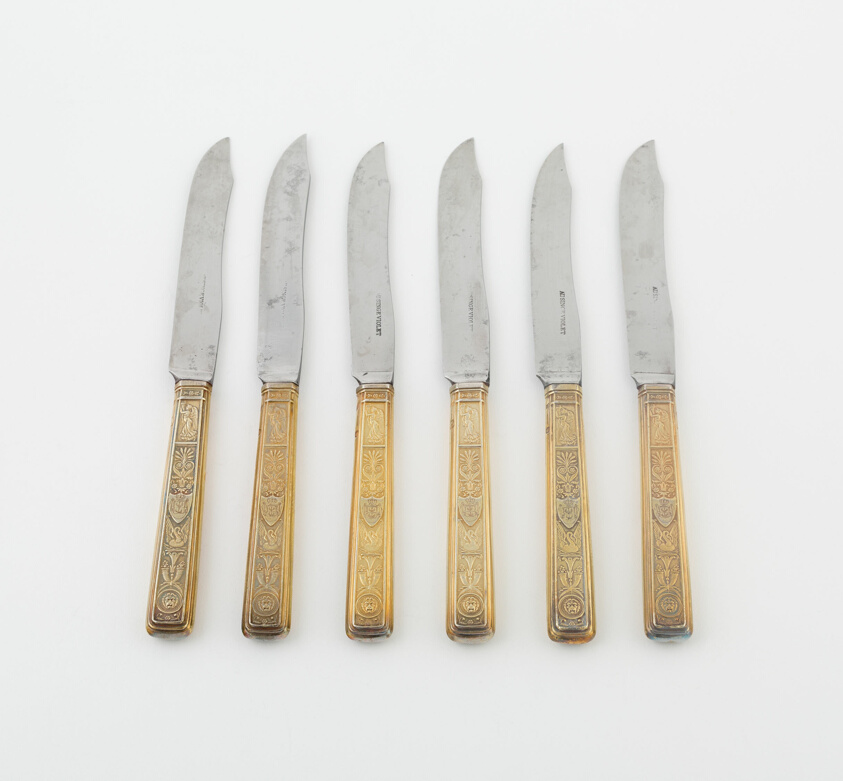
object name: Metalwork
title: Dessert Knives (2)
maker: Martin-Guillaume Biennais; French, 1764-1843; Pierre-Benoît Lorillon; French, 1757-1816; Paris, France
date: 1789/1820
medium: Silver gilt and steel blades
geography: Paris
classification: flatware; knives; metalwork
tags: Borghese Service